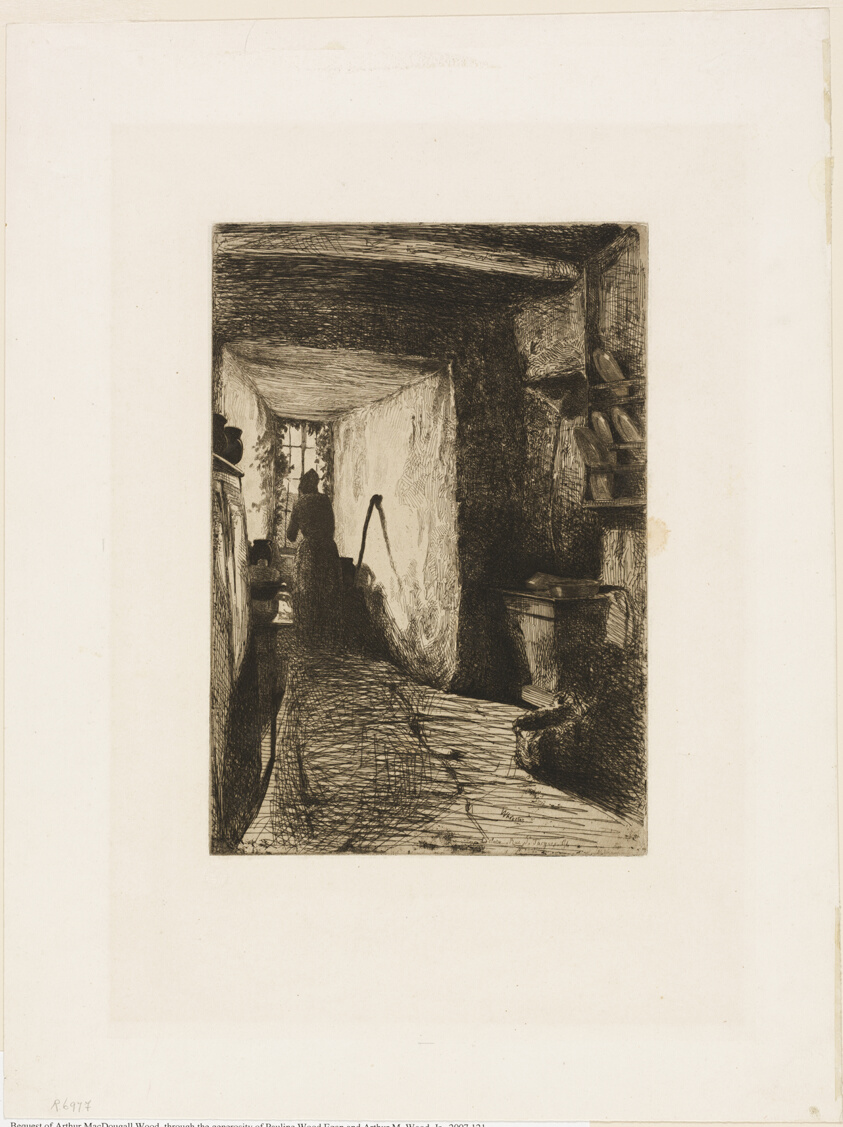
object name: Print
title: The Kitchen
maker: James McNeill Whistler (American, 1834-1903)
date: 1858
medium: Etching with foul biting in black ink on ivory China paper, laid down on white wove paper (chine collé)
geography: United States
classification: etching; foul biting; print; prints and drawing; paper